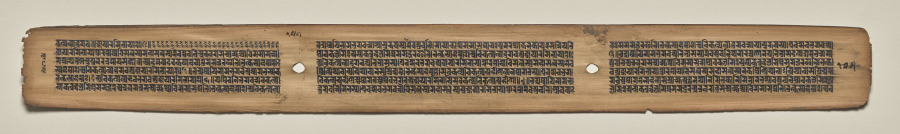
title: Text, folio 155 (verso), from a Manuscript of the Perfection of Wisdom in Eight Thousand Lines (Ashtasahasrika Prajnaparamita-sutra)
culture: Eastern India, Bihar, Vikramashila Monastery. Painting: Nepal, Kathmandu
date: Sunday, September 14, 1119 (year 239 of the Newar Samvat in the month of Ashvina)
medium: gum tempera and ink on palm leaves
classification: Painting